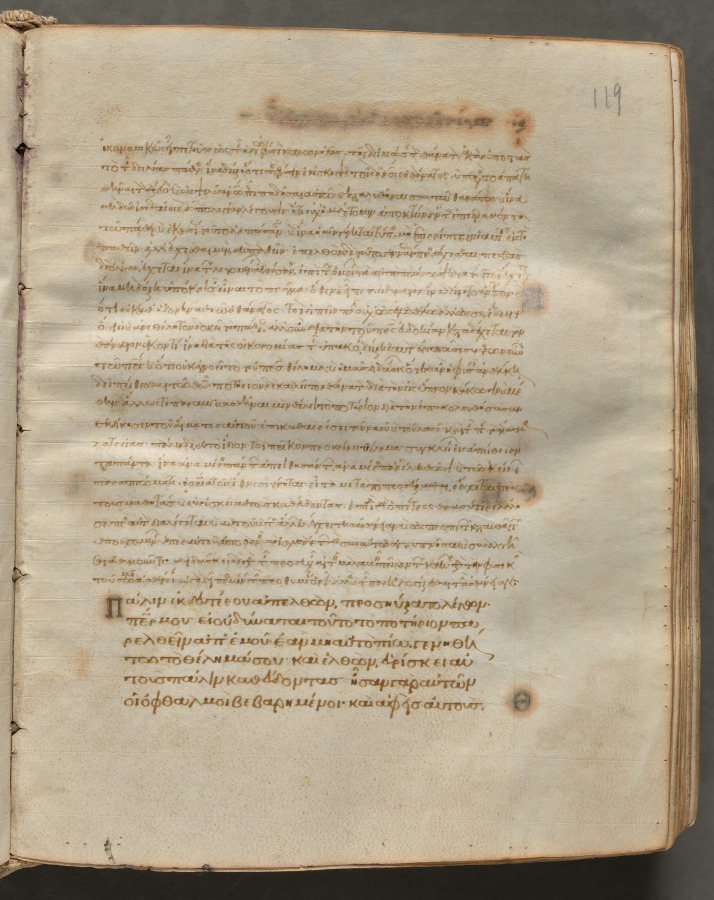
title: Text, folio 119 (recto), from a Gospel Book with Commentaries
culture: Byzantium, Constantinople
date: c. 1000–1100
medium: ink, tempera, and gold on vellum; leather binding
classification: Bound Volume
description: Each of the four gospels in this book opens on a page with brilliantly illuminated borders depicting the author of the text as well as birds-principally peacocks, symbols of the immortality of the soul-and fountains, representing the fountain of life and the salvation of the soul. This volume consists of 428 leaves with texts in Greek. Its level of sophistication suggests that it was probably written and decorated in a monastery in Constantinople.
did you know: Gospel Books were carried in procession through Byzantine churches.